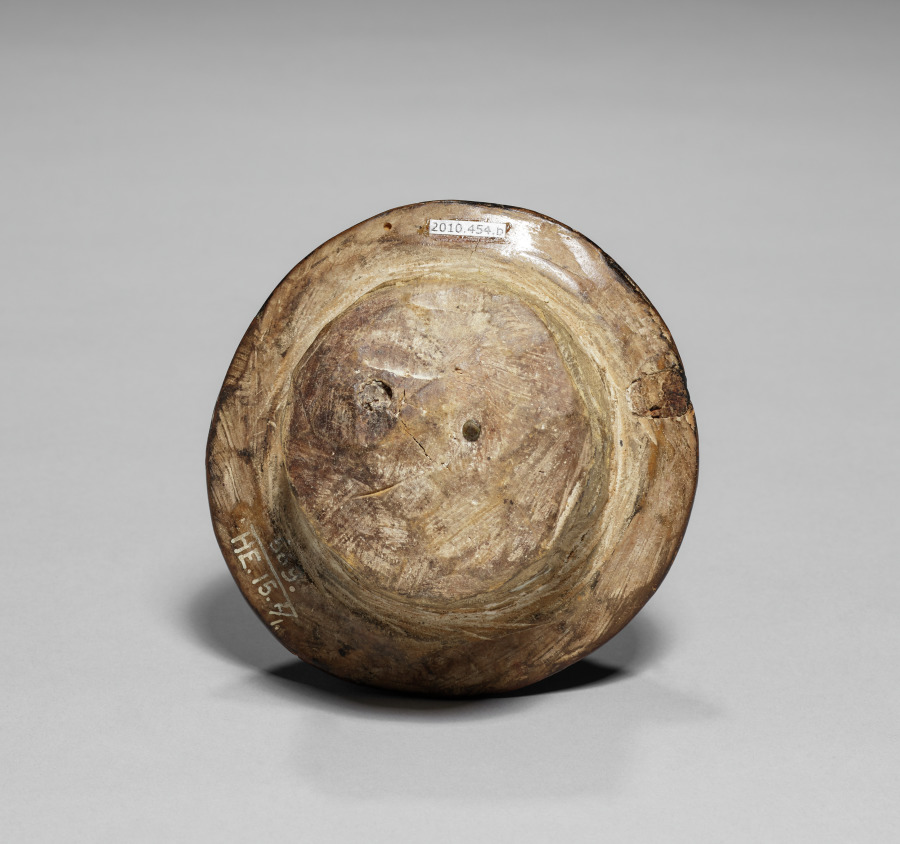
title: Female Bowl-Bearing Figure (lid)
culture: Africa, Central Africa, Democratic Republic of Congo, Luba-style carver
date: late 1800s-early 1900s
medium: Wood and upholstery studs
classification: Sculpture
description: This lid is part of a bowl-bearing figure. In Luba-style art, an object's beauty affects how well it works. While bowl-bearing figures had many possible uses, a royal diviner likely used this well-carved image of a woman carrying a bowl in rituals. Dusty traces of mpemba (white chalk) fleck the shining exterior and the bowl's interior, showing it once held this sacred powder. Diamond-shaped scarification marks at her waist, chest, and back add to her beauty. Her hair is carved into the cascading layered hairstyle worn in the Luba region at the turn of the twentieth century. Strands of imported glass beads encircle her waist and neck, and dangle from her hair. The alternating white and blue beads may symbolize the moon and Mbidi Kiluwe, a culture hero linked to royal practice and smithing. While much Luba-style art depicts women—who are societally important—men created and owned the majority of such works.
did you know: It is rare for a Luba-style bowl bearer figure to still have its lid.